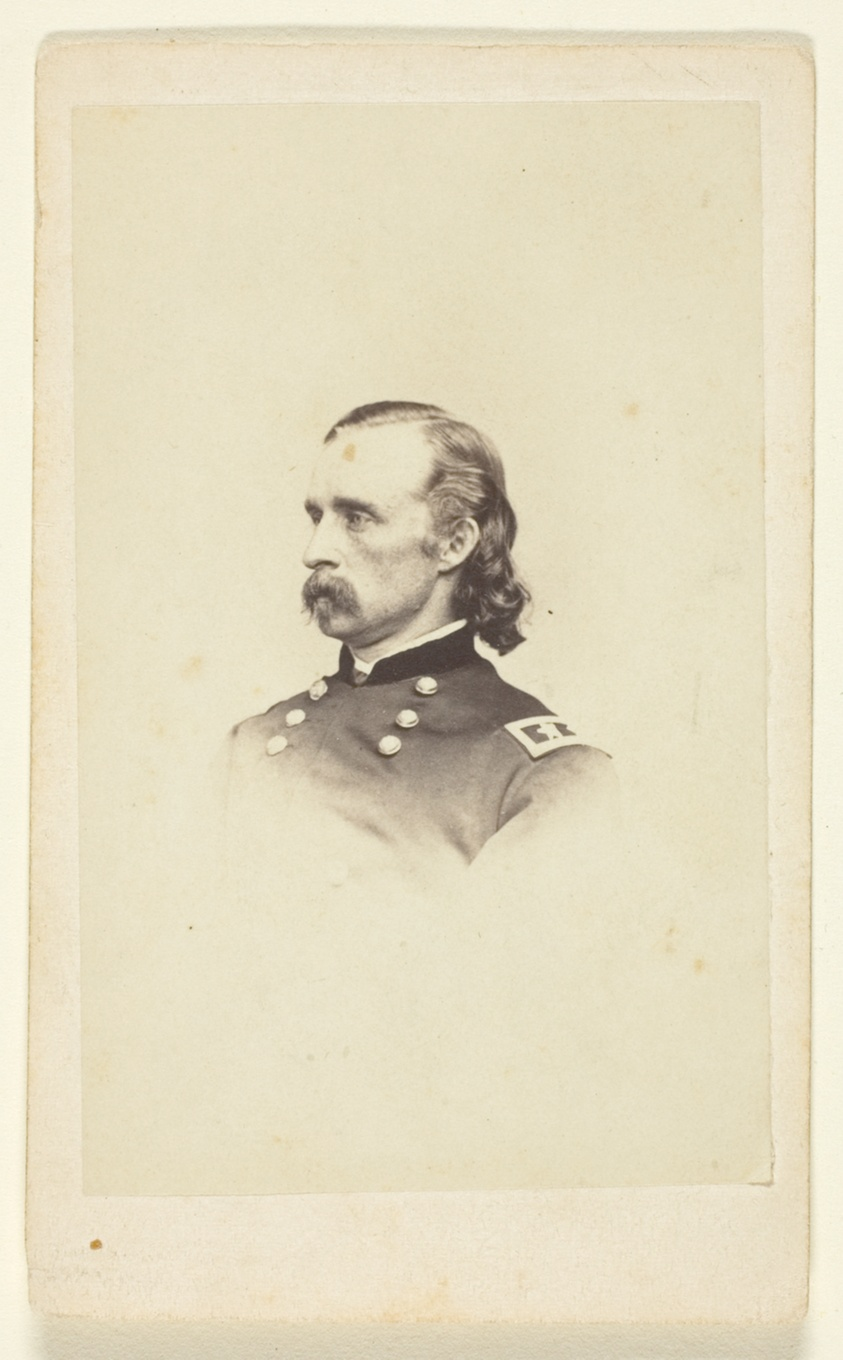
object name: Photograph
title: General George Armstrong Custer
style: 19th century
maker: Brady's National Photographic Portrait Galleries (American, 20th century)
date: 1860/76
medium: Albumen print (carte-de-visite)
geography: United States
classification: carte-de-visite (albumen); albumen silver print; photographic process; photography; photograph; card photographs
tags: Collected by Hugh Edwards, portraits